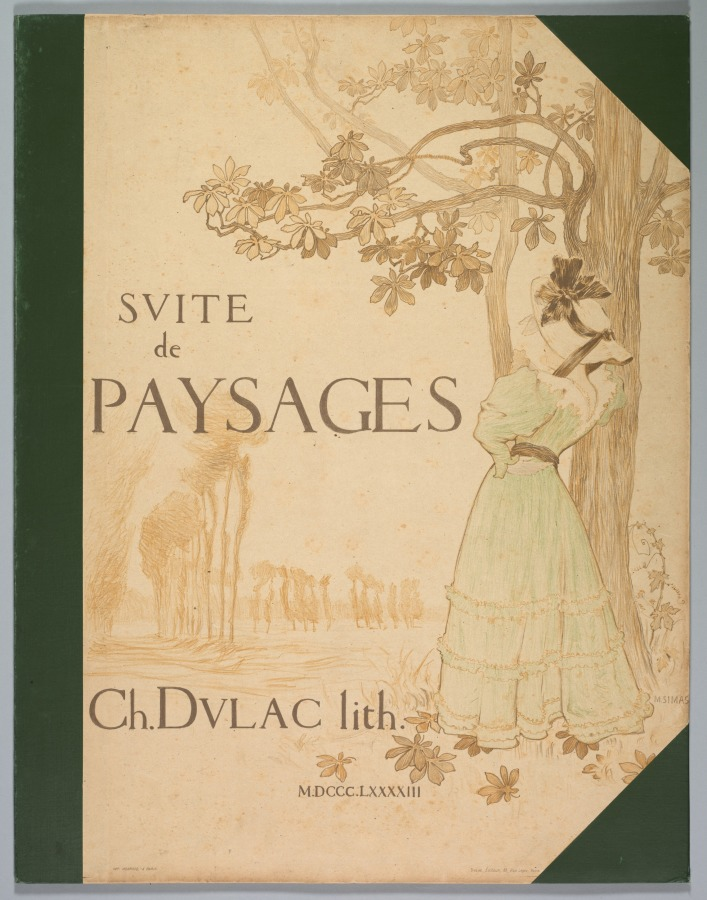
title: Suite de Paysages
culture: France, 19th century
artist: Charles Marie Dulac (French, 1865–1898)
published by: Published by the artist, residing at 61 rue Pepic at that time.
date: 1892–1893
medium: Set of 8 color lithographs with a frontispiece, loose as issued in publisher's original board portfolio, half bound with green cloth, and interior with marbled endpapers.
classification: Print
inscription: Each lithograph is signed and numbered.